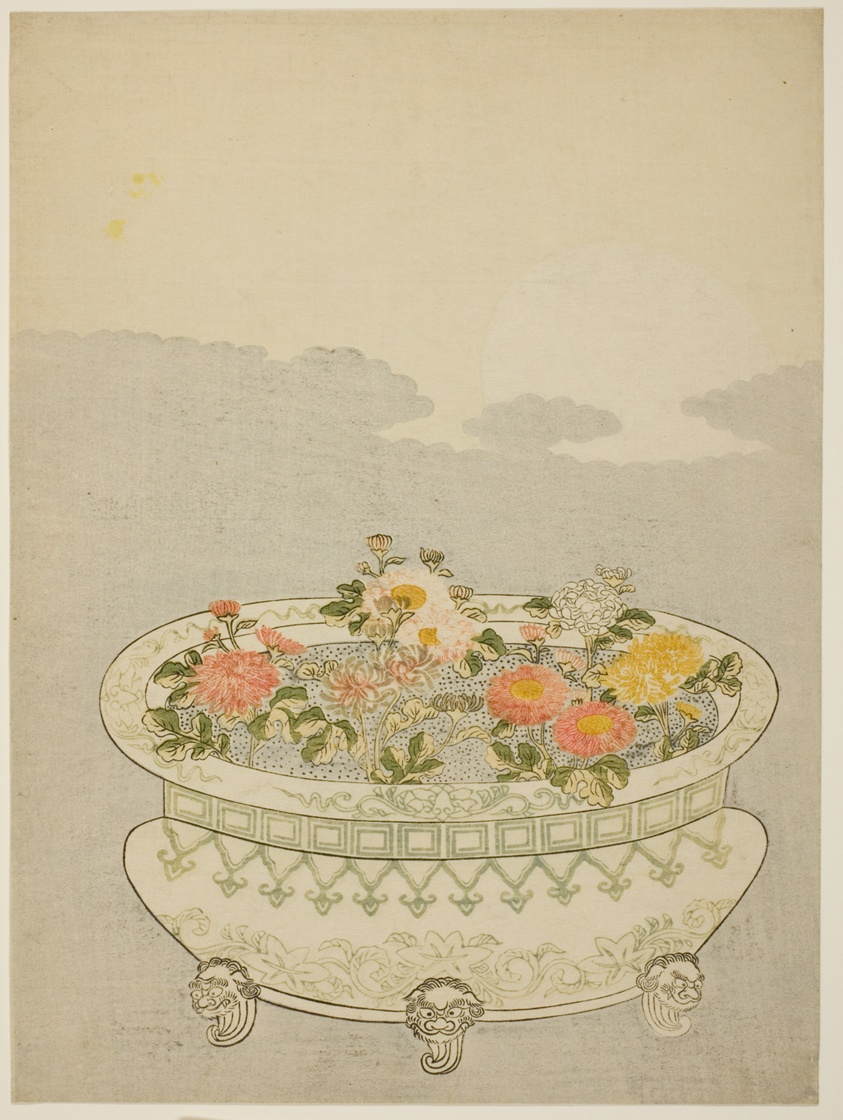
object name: Print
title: Chrysanthemums and the Rising Moon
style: Japanese (culture or style)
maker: Attributed to Suzuki Harunobu 鈴木 春信; Japanese, 1725 (?)–1770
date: c. 1766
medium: Color woodblock print; chuban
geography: Japan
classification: woodblock print; print; asian art